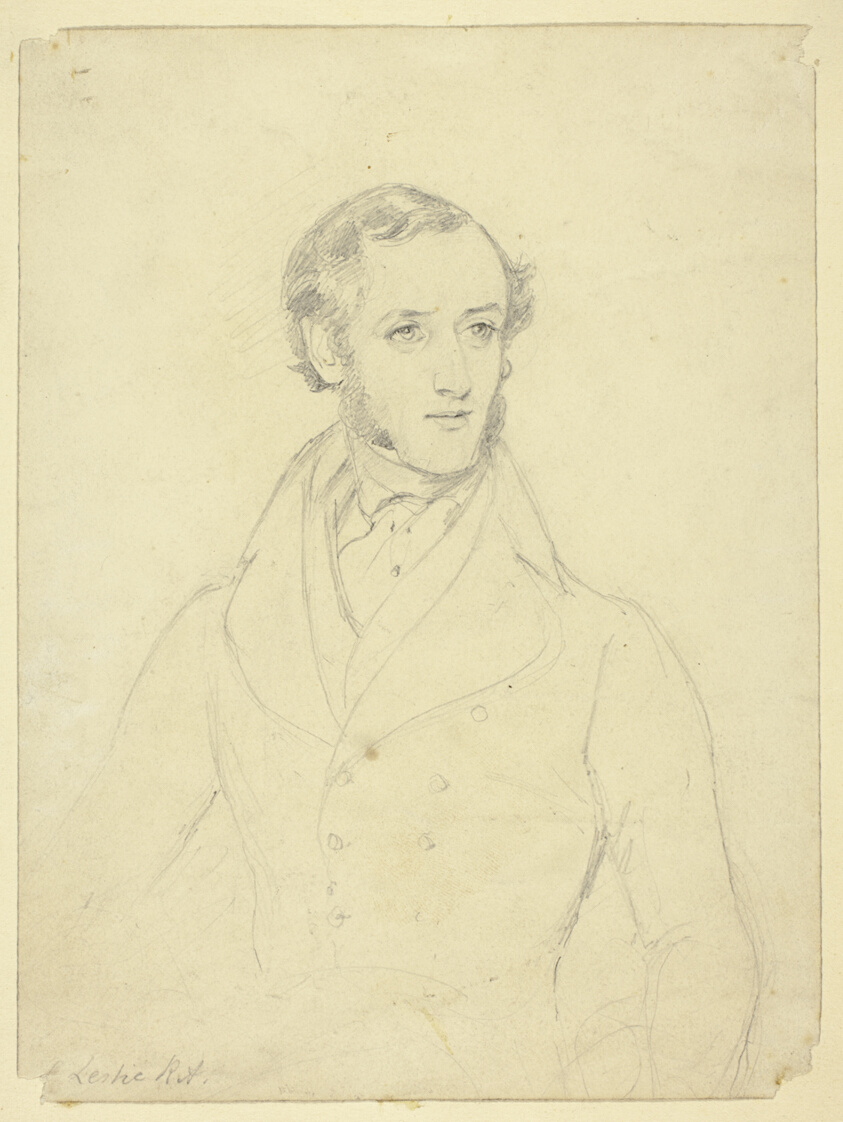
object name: Drawing and Watercolor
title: Leslie, R.A.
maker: Unknown Artist (British, 19th century); or possibly William Parrott (English, 1813-1869)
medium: Graphite on cream wove paper, tipped onto cream wove paper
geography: United Kingdom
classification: graphite; drawings (visual works); prints and drawing